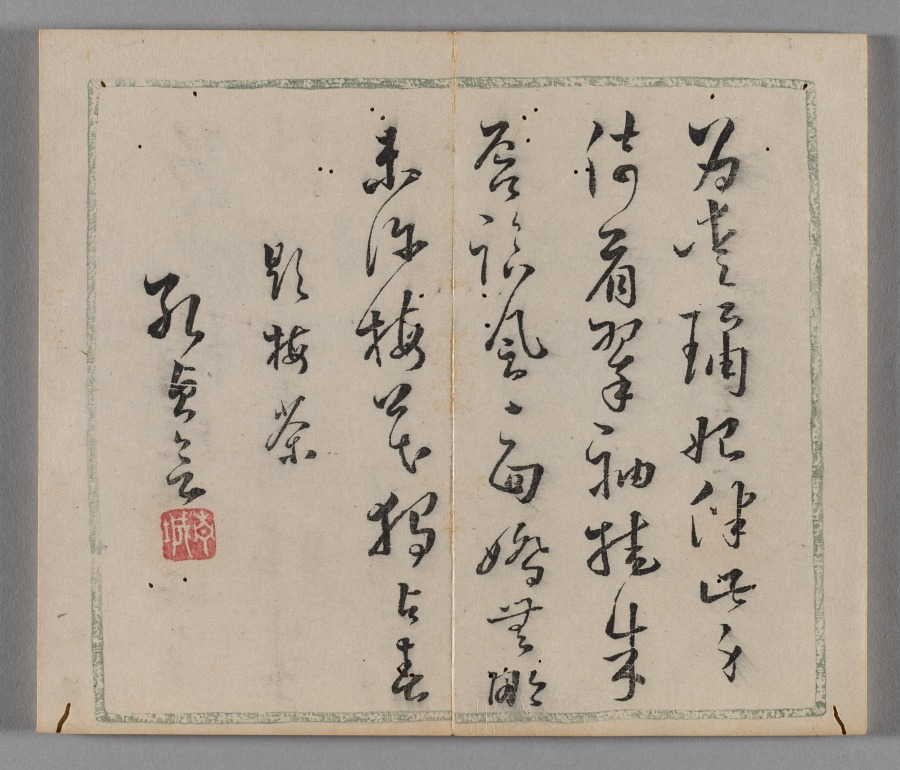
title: Ten Bamboo Studio Collection of Calligraphy and Painting: Round Fans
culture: China, Qing dynasty (1644-1911)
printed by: Hu Zhengyan (Chinese, c. 1584–1674)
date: 1633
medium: Woodblock-printed book; ink and colors on paper; first edition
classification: Print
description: Color printing reached a level of perfection in the early 1600s, as seen in this Ten Bamboo Studio Collection of Calligraphy and Painting and the Mustard Seed Garden Manual of Painting (printed 1679 and 1701). The painterly quality, precision in registering (aligning) the woodblocks, and harmonious colors made them the most successful color print editions in Chinese history. Both editions were printed and compiled in Nanjing, spread nationwide, and had a great impact on the arts in Japan and Korea.